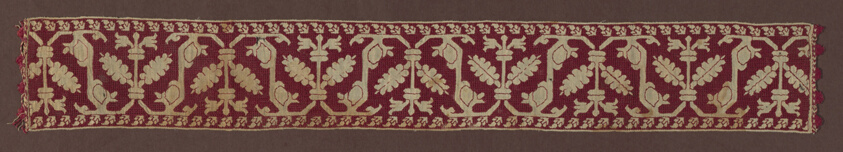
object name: Textile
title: Border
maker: Italy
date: 1601/25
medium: Linen, plain weave; pulled thread work embroidered with silk in back, double running, and two-sided Italian cross stitch; edged with silk and linen fringe of oblique twill interlacing with two-color supplementary weft uncut fringe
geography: Italy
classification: textile; needlework (visual works)